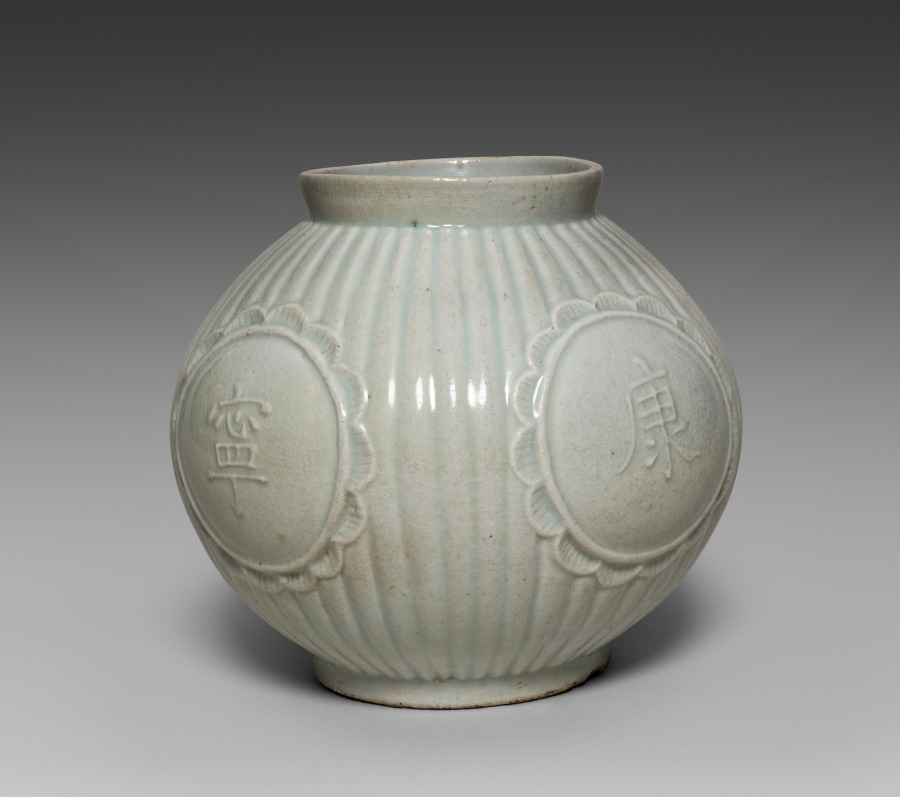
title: Jar with Four Auspicious Characters in Relief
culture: Korea, Joseon dynasty (1392–1910)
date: 1800s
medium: glazed porcelain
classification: Ceramic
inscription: longevity 壽, happiness 福, health 康, and peace 寧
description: This white porcelain vase is decorated with four Chinese characters symbolizing auspicious (hopeful) wishes—longevity, good fortune, health, and peace—each within a floral medallion. Such jars were often presented as birthday or wedding gifts, conveying the giver’s blessings for a long and harmonious life. This object was purchased in 1981 from Kochukyo (壺中居), an antique gallery founded in 1924 in Tokyo, Japan. Many important Korean works remain in Japanese private collections, after being taken there during the Japanese colonial period (1910–45). Consequently, Japanese antique galleries continue to handle Korean antiquities, serving as significant channels for their circulation today.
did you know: This type of jar with auspicious characters was often used as a birthday or wedding gift.